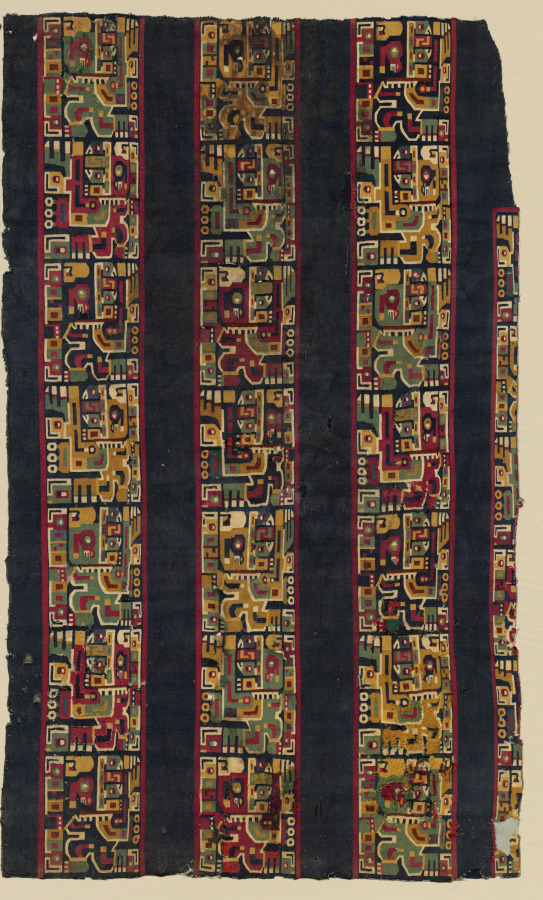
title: Half of a Sleeved Tunic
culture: Central Andes, Middle Horizon, Wari, 6th-11th century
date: c. 500–1000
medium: single-interlocked tapestry; cotton warp; camelid fiber weft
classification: Textile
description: The bird-headed creature in profile that repeats in each of this tunic's design fields gazes upward, holds a staff of authority in front of its body, and wears an ornate headdress behind which a three-feathered wing can be seen. The extremely high technical quality of such tunics suggests that the Wari reserved bird imagery for their most exalted rulers. Here, the original incorporated more than twice as much yarn as the routine--some 19 miles, all handmade and much dyed an inky, dark blue, the most prestigious of Wari colors.